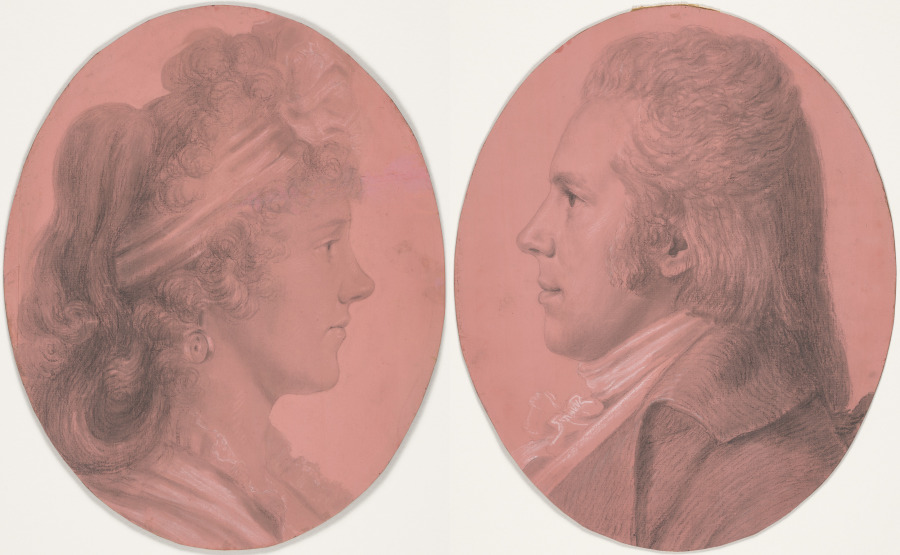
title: Portrait of Georges Arnold Fitzwilliam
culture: France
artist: Charles Balthazar Julien Fevret de Saint-Mémin (French, 1770–1852)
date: c. 1790–1852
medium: Black and white chalk on buff paper with pink wash in original frame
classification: Drawing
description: This portrait and its pair (2024.35.2), depict George Fitzwilliam, an English merchant, and his American wife Eleanor Ramsay Fitzwilliam, who sat in New York for the French émigré artist Charles Balthazar Julien Févret de Saint-Mémin. Saint-Mémin used a recently invented mechanical device called a physiognotrace to trace accurate profiles of his sitters, which he then completed in black and white chalks. The technology enabled Saint-Mémin to establish a thriving business catering to prominent Americans—including Presidents Washington, Adams, Jefferson, and Madison, Benjamin Franklin, and several Native American chiefs—at a time when he was in exile from the French Revolution. As part of each commission, Saint-Mémin also supplied etchings of the portrait in a reduced size, which could be given as keepsakes to family and friends.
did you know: The physiognotrace device used to create this portrait consisted of a wooden frame within which a sitter posed in profile; the artist then peered through an eyepiece and followed the contour and features of the sitter’s face by maneuvering a graphite pencil attached to the mechanism.